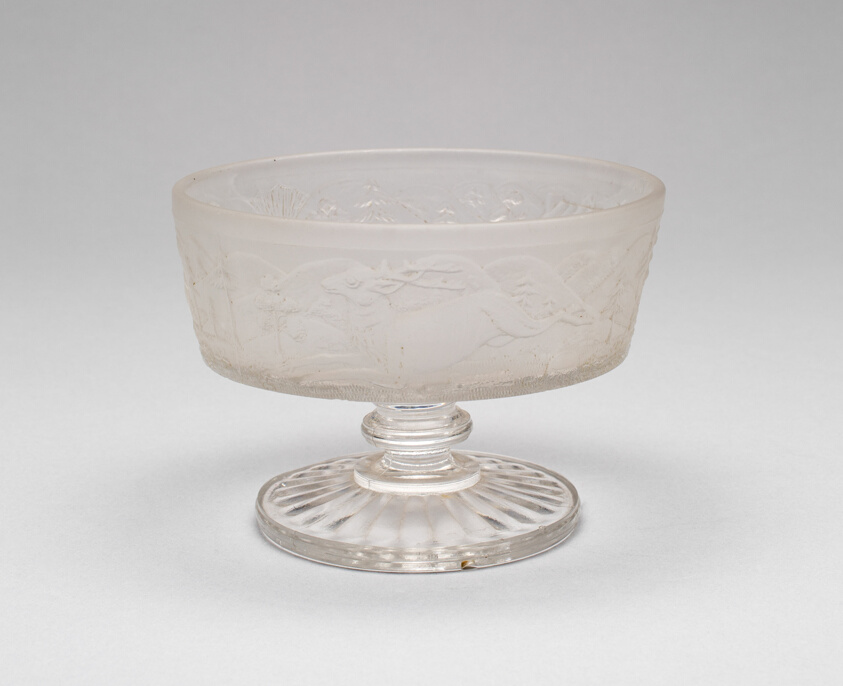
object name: Glass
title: "Westward Ho!/Pioneer" pattern footed dish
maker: Gillinder and Sons, 1861–c. 1930; Philadelphia or Greenbsburg, Pennsylvania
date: c. 1876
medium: Glass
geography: Philadelphia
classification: dish (vessel); glass; american decorative arts; american arts; decorative arts